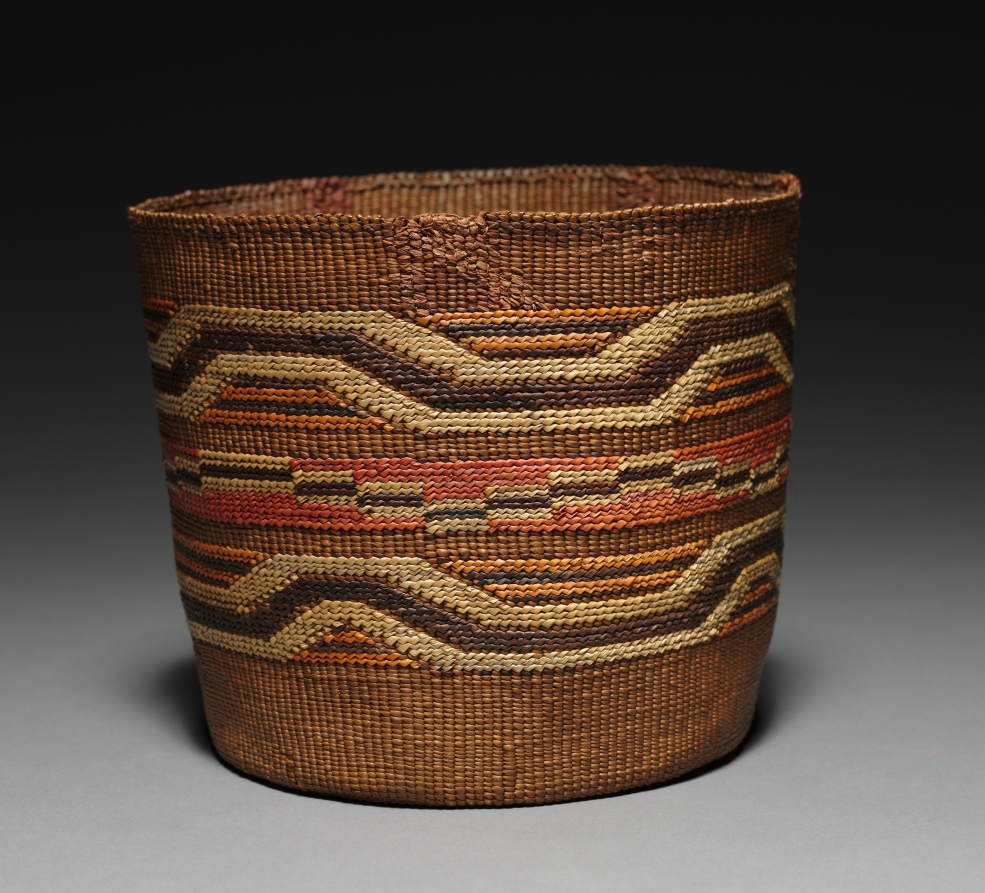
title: Bowl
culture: Northwest Coast, Tlingit, Unassigned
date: Unassigned, before 1917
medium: twined, imbricated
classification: Basketry